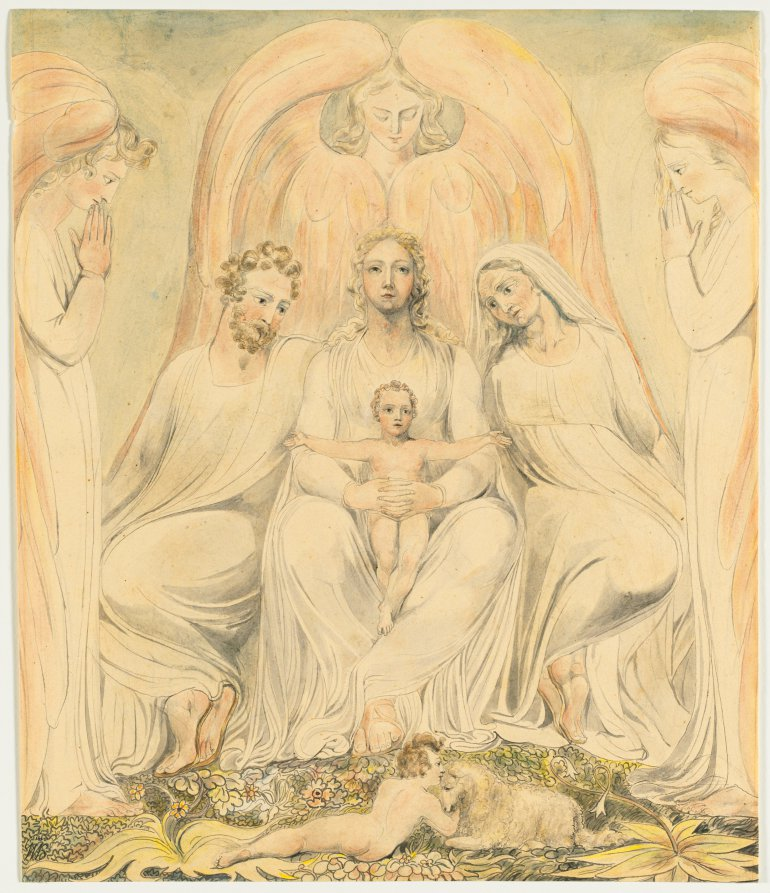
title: The Holy Family (Christ in the Lap of Truth)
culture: England, London, 18th century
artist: William Blake (British, 1757–1827)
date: c. 1805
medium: black, gray, and brown ink applied with pen and point of brush; gray, pink, yellow, and green wash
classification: Drawing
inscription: signed, lower right, in black ink: [artist's monogram:8 inv / wb]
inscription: verso, upper center, in graphite: G [collector's mark? (not in Lugt)]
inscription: across bottom, in graphite: no. 9 [S?]ingle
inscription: across bottom, in graphite: The Holy Family / Jesus-Mary-Joseph-Elizabeth + St. John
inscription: lower center, in graphite: 50/ [7?]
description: Although he rejected institutionalized religion, Blake was intensely spiritual, and much of his art was inspired by a highly personal reading of the Bible or by literature based upon it, such as John Milton’s Paradise Lost (1667). The Virgin Mary is centered in this highly stylized composition. Upon her lap she clasps the infant Christ whose outstretched arms foreshadow the Crucifixion. The Mother and Child are flanked by Saint Joseph on the left, and Saint Anne (the Virgin’s mother), on the right. Below, Saint John the Baptist, who foretold Christ’s death and resurrection, plays with a lamb.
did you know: This drawing was first owned by Thomas Butts, an English civil servant who became William Blake's most important patron and supporter for about two decades.